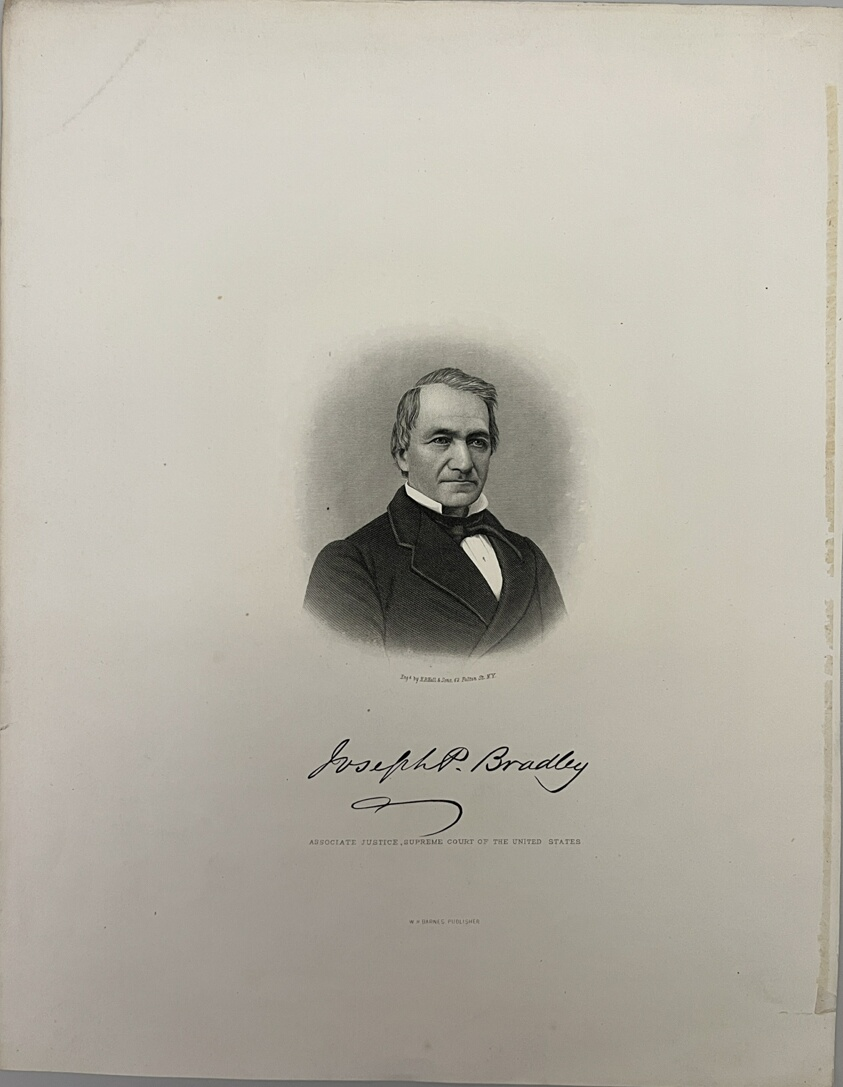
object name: Print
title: Joseph P. Bradley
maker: Henry Bryan Hall (American, 1808-1884); published by W.H. Barnes (American, 19th century)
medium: Stipple and line engraving on paper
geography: United States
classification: reproduction; print; prints and drawing